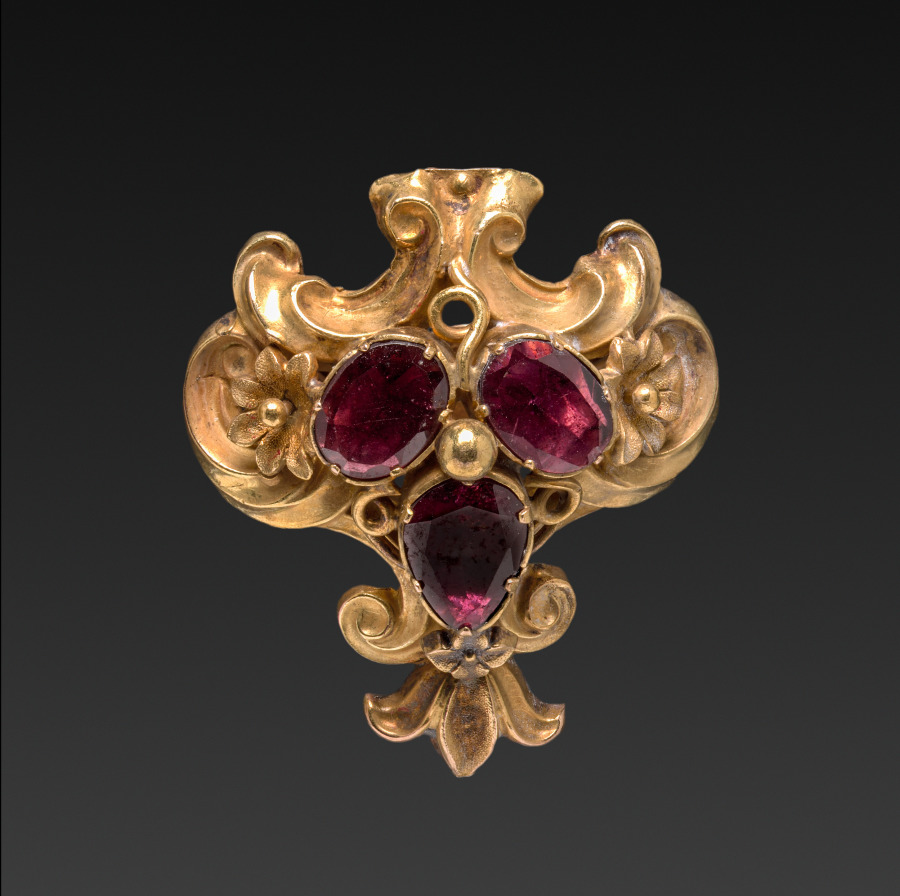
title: Earring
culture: Germany, possibly, 19th century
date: c. 1840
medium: gold and jewels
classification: Jewelry